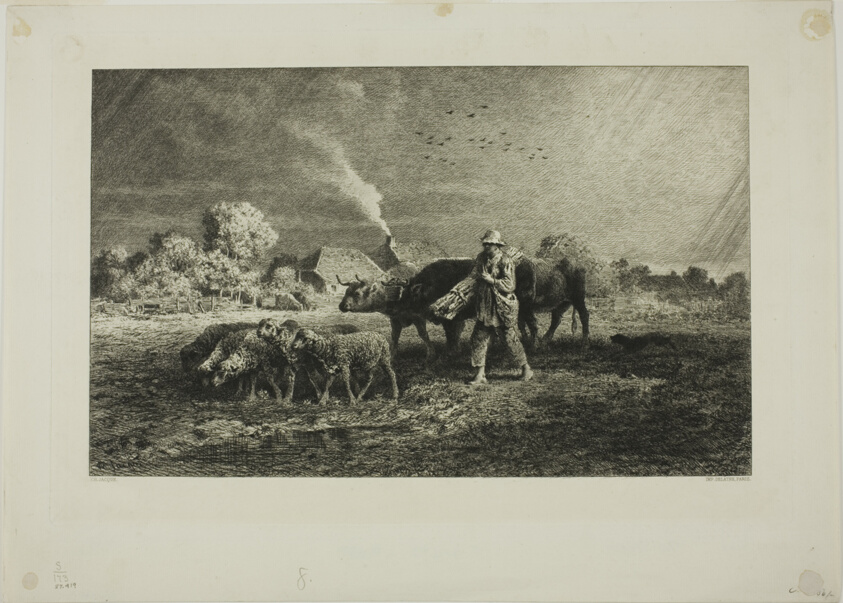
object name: Print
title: The Storm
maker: Charles Émile Jacque (French, 1813-1894)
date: 1866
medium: Etching, drypoint, roulette, and burin on paper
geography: France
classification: etching; print; prints and drawing